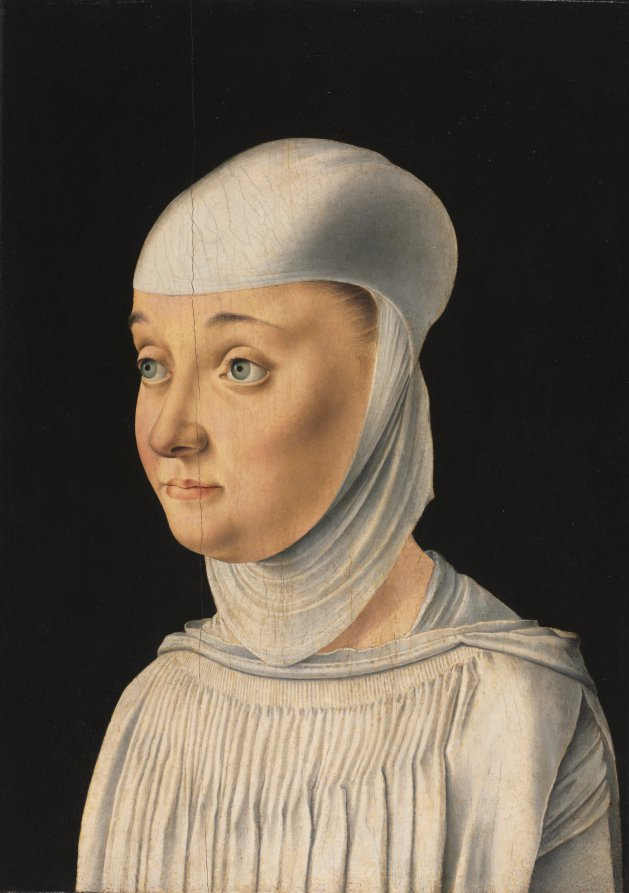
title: Portrait of a Woman, Possibly a Novice of San Secondo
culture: Italy, 15th century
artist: Jacometto Veneziano (Italian, 1497)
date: c. 1490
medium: oil on wood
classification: Painting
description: Scholars have recently speculated that this work does not actually depict a nun, although it has been described as such since 1543. A beautiful young woman presented as saintly, a regular occurrence, the sitter may be the wife or daughter of Alvise Contarini. Her attire, particularly the head garb, may be secular, while some scholars consider it to be Benedictine or Dominican. The San Secondo convent was reserved for daughters of the wealthiest Venetians and conventions of dress were fairly loose until 1515 when strict reforms were enforced by religious and political authorities in Venice.